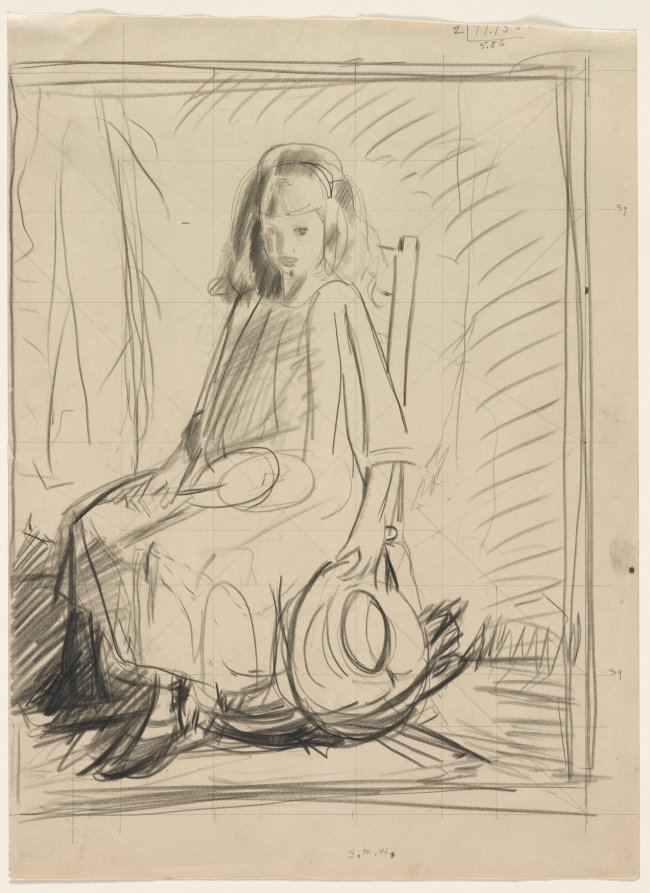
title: Anne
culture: America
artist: George Bellows (American, 1882–1925)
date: 1920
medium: pencil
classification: Drawing